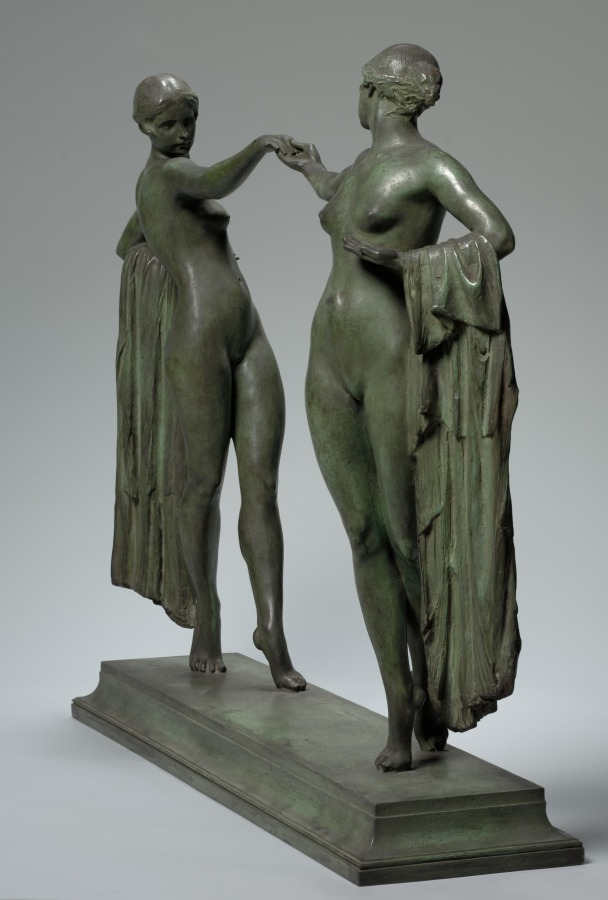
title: Andante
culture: America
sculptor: Mario Korbel (American, born Bohemia [now Czech Republic], 1882–1954)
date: 1917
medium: bronze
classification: Sculpture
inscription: signed on base: MARIO KORBEL 1917 ©